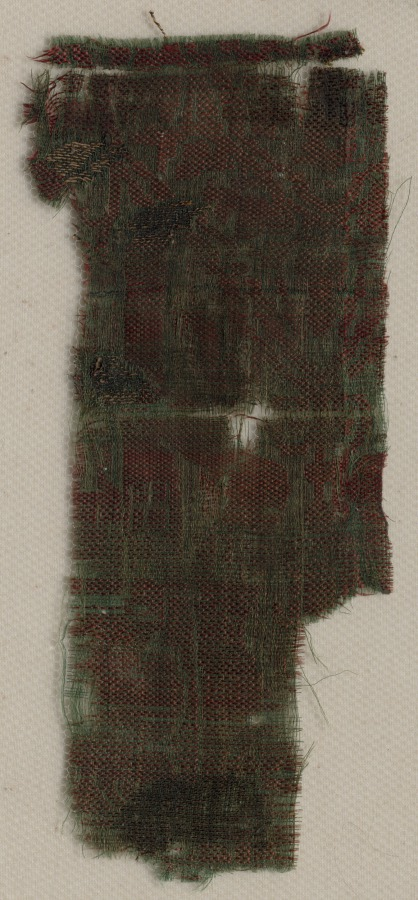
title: Three Fragments of Italian Gothic Silk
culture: Italy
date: 1300s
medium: lampas weave, brocaded; silk and gold thread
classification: Textile